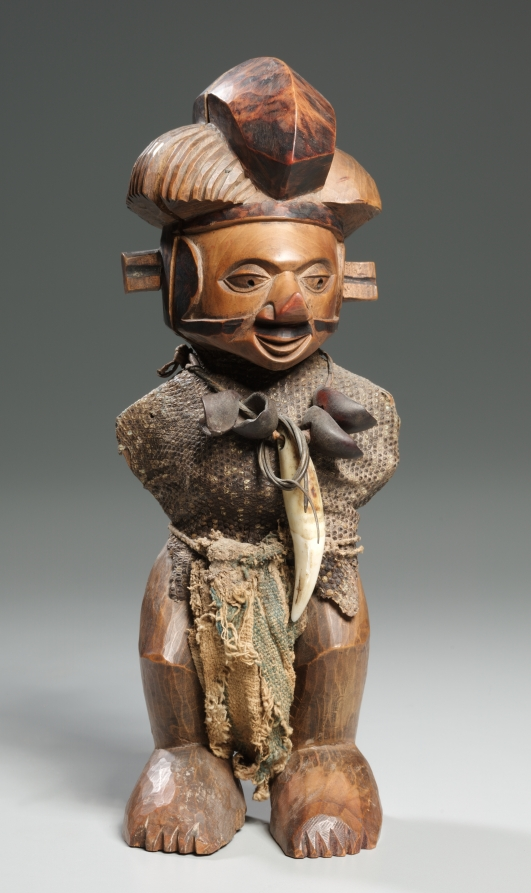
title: Figure (kiteki)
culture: Africa, Central Africa, Democratic Republic of Congo, Yaka-style carver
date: late 1800s–mid-1900s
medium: Wood, lizard skin, leopard tooth, pods, cloth, and natural fiber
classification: Sculpture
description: Biteki is the generic name for Yaka figures used as containers for magical ingredients. After being charged by a ritual specialist, they become minkisi, or power objects, and gain the power to either cure or harm. This example, with various leadership accouterments, likely belongs to the category called phuungu. Placed inside a house, the statuette would have protected against witches and other evil.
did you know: The sculptures and the specially selected materials inside assist the prayers of owners for protection from harm, sickness, or loss.